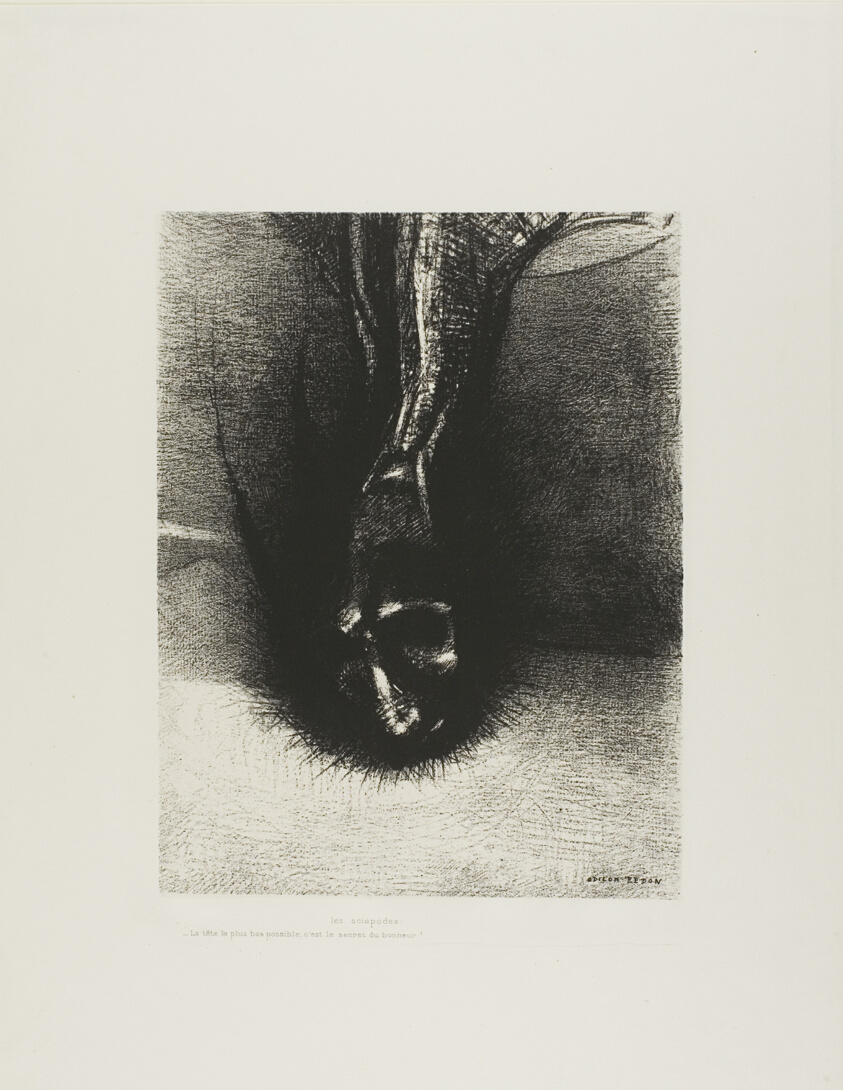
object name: Print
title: The Skiapods: "The head as low as possible, that is the secret of happiness!", plate 6 of 6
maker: Odilon Redon (French, 1840-1916)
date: 1889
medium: Lithograph in black on ivory China paper laid down on ivory wove paper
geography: France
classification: lithograph; print; prints and drawing; paper